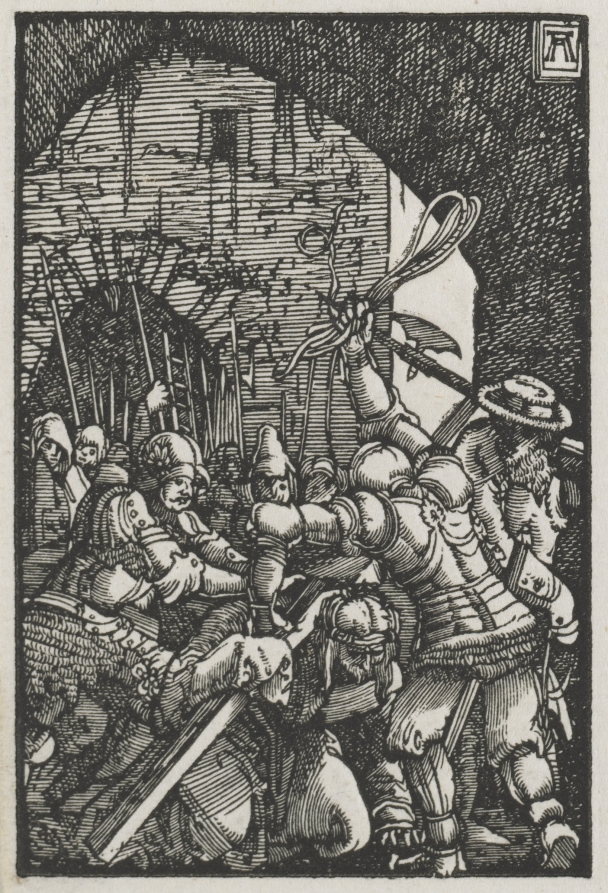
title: The Fall and Redemption of Man: Christ Bearing the Cross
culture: Germany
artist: Albrecht Altdorfer (German, c. 1480–1538)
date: c. 1515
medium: woodcut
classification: Print